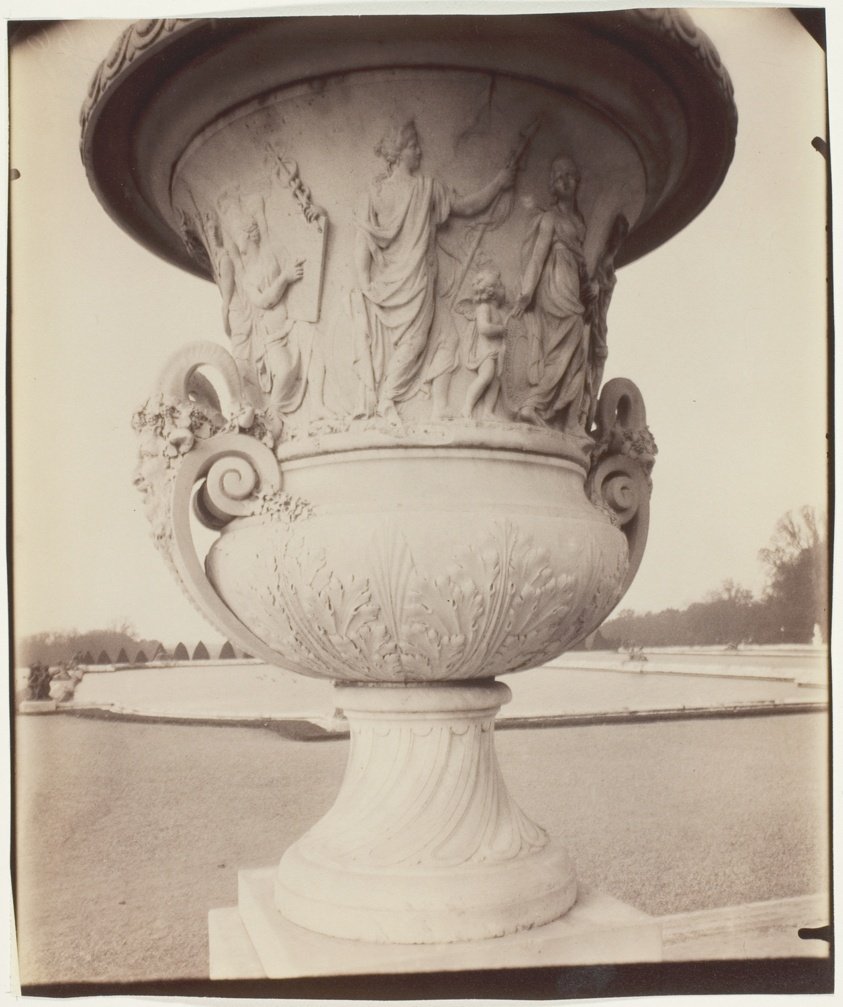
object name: Photograph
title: Versailles, Vase par Tuby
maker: Jean-Eugène-Auguste Atget (French, 1857–1927)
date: 1904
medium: Albumen print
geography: France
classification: albumen silver print; photographic process; photography; photograph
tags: Collected by Hugh Edwards